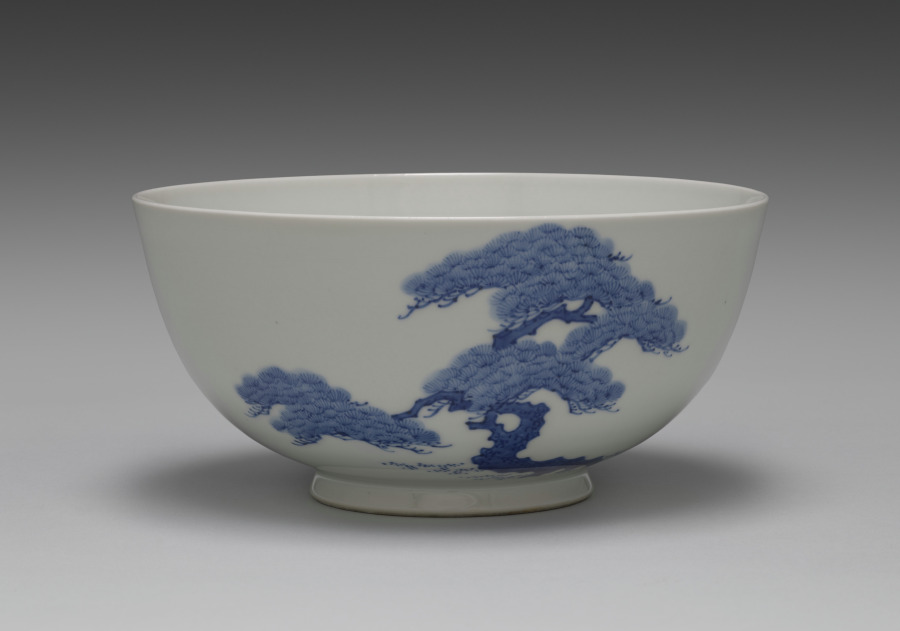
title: Bowl with Pines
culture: Japan, Meiji period (1868–1912)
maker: Seifū Yohei III (Japanese, 1851–1914)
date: 1893–1914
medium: porcelain with underglaze blue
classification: Ceramic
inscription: Inscription by Seifū Yohei IV on the box states that the bowl is the work of Yohei III.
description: The bowl has slightly more detailed surface designs painted in blue under the glaze than some other Yohei III's other teaware, like the Water Cooler with Pines, CMA 2022.163. The three pines, with two, three, and four racks of boughs respectively, have more angular rather than curved trunks, with clearly articulated bark.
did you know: The box for the bowl carries an attestation by Yohei IV that it is the work of his predecessor.